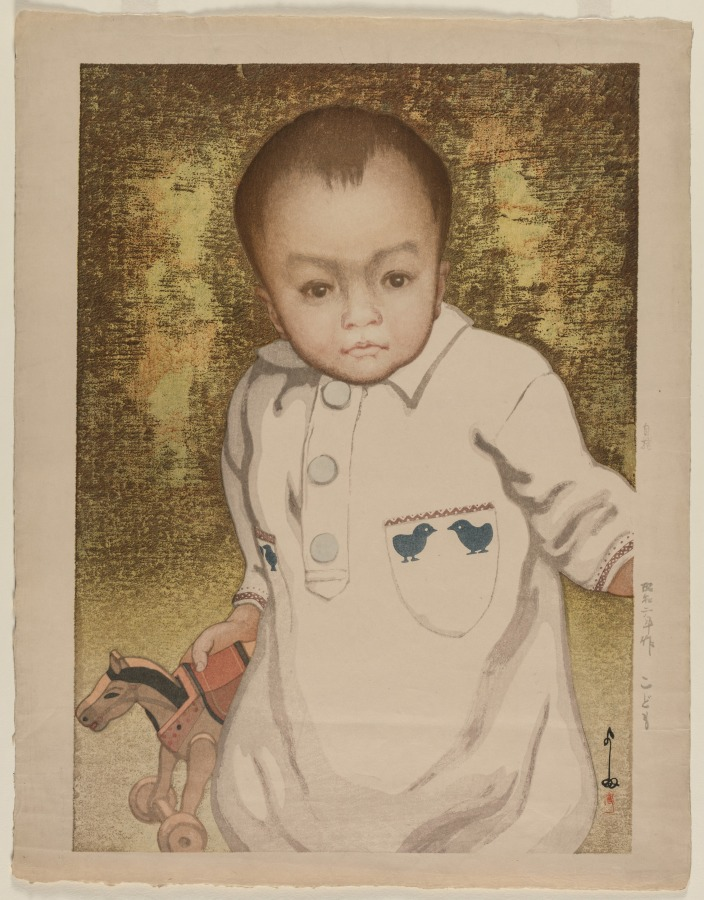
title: Child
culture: Japan, Shōwa period (1926–89)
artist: Yoshida Hiroshi (Japanese, 1876–1950)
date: 1927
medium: color woodblock print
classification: Print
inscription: Signature: Yoshida Artist Seal: Hiroshi Engraver: Yoshida Printer: Yoshida (jizuri stamped at right)